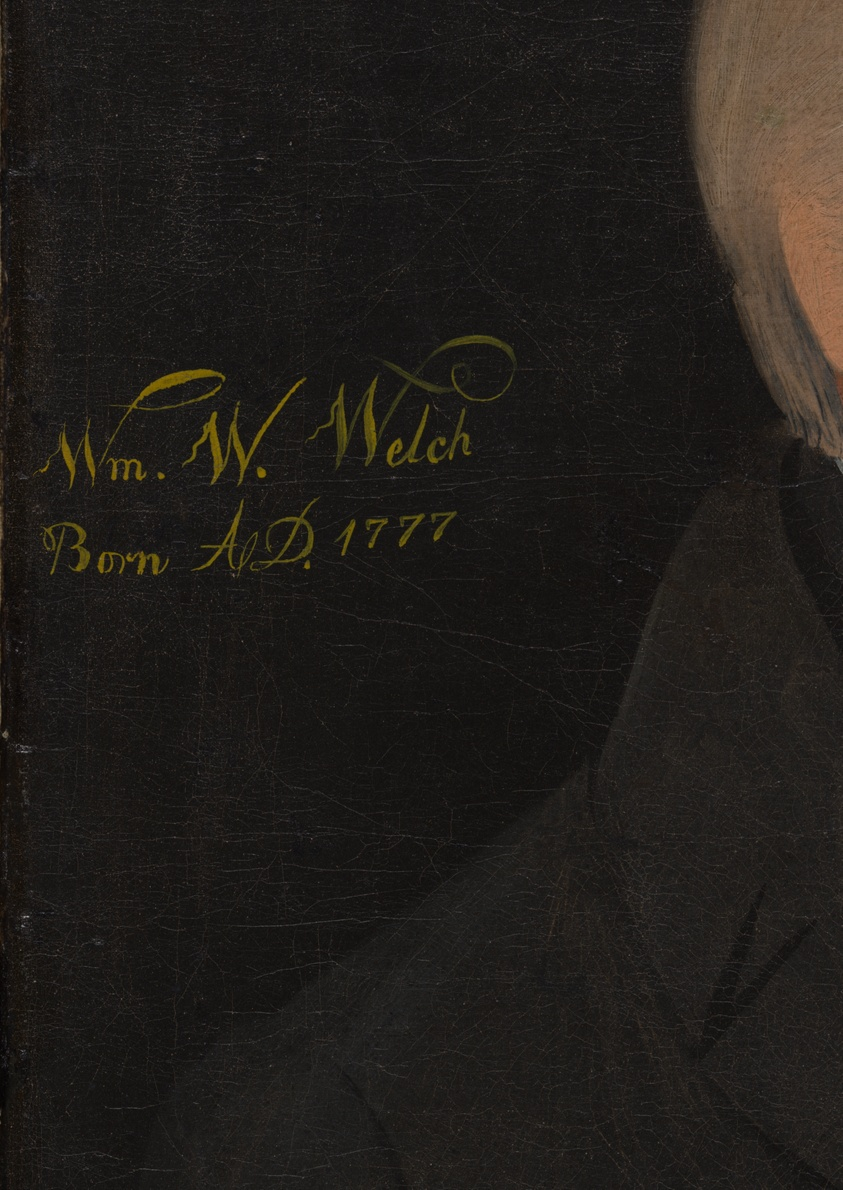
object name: Painting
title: William W. Welch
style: Folk Art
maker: Sheldon Peck (American, 1797–1868)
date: c. 1837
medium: Oil on canvas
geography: United States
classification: painting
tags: people, portraits